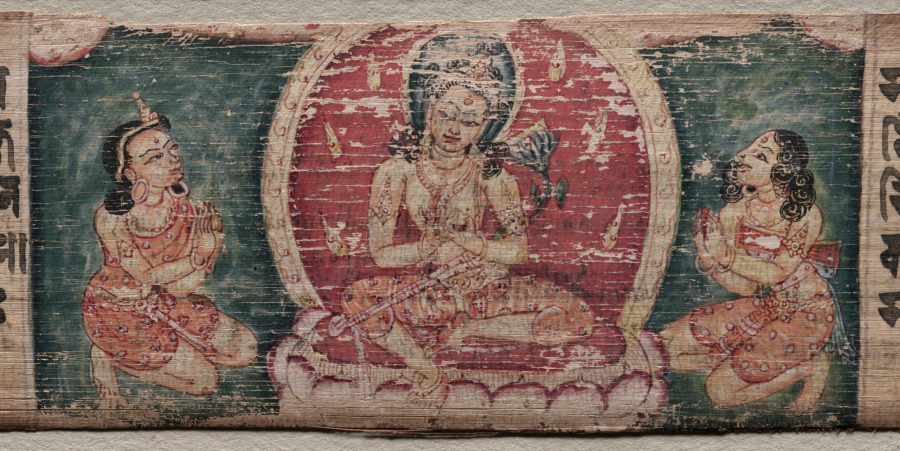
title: Bodhisattva Manjushri with two forms of Avalokiteshvara, folio 348 (recto) from a Gandavyuha-sutra (Scripture of the Supreme Array)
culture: Nepal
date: 1000–1100s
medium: gum tempera and ink on palm leaf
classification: Painting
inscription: >> dharmamukhānyavakrāntānyabhūvan nānānayaiḥ // atha khalu samantabhadro bodhisattvo mahāsattvaḥ sudhanaṃ śreṣṭhidārakametadavocat - dṛṣṭaṃ te kulaputra mama vikurvitam? āha - dṛṣṭamārya / api tu tathāgataḥ prajānan prajānīyāttāvadacintyamidaṃ vikurvitam / so 'vocat - ahaṃ kulaputra anabhilāpyānabhilāpyabuddhakṣetraparamāṇurajaḥsamān kalpān vicaritaḥ sarvajñatācittamabhilaṣamāṇaḥ / ekaikasmiṃśca mahākalpe 'nabhilāpyānabhilāpyabuddhakṣetraparamāṇurajaḥsamāstathāgatā ārāgitā bodhicittaṃ pariśodhayatā / ekaikasmiṃśca mahākalpe sarvatyāgasamāyuktāḥ sarvalokavighuṣṭā mahāyajñā yaṣṭāḥ / sarvasattvapratipādanā sarvajñatāpuṇyasaṃbhāratā / ekaikasmiṃśca mahākalpe anabhilāpyānabhilāpyabuddhakṣetraparamāṇurajaḥsamāstyāgā (Gv 426) mahātyāgāḥ kṛtāḥ, atyarthatyāgāḥ kṛtāḥ sarvajñatādharmānabhiprārthayatā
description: The Bodhisattvas of Wisdom and Compassion sit in majesty, with Manjushri in the preaching gesture in the center, being honored by two worshipers. His mandorla dances with flames, and tongues of flames encircle its border. Two different forms of Avalokiteshvara are in the flanking paintings, a two-armed and a four-armed form.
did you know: A book on a blue lotus is just over the left shoulder of the Bodhisattva of Wisdom, Manjushri.